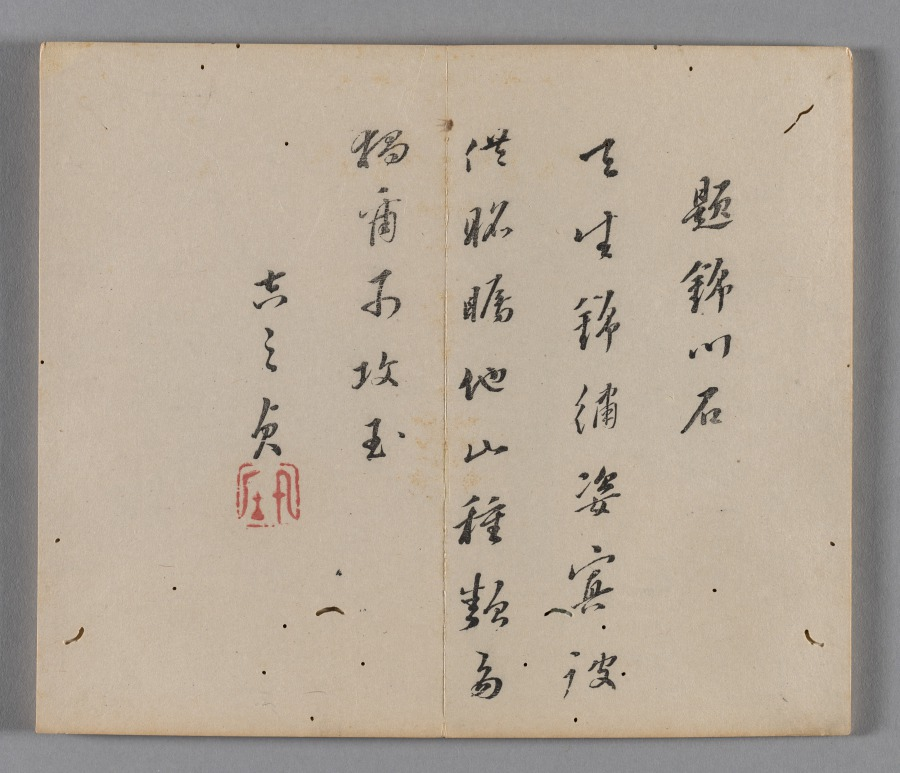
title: Ten Bamboo Studio Collection of Calligraphy and Painting: Miscellaneous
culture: China, Qing dynasty (1644-1911)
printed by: Hu Zhengyan (Chinese, c. 1584–1674)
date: 1633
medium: Woodblock-printed book; ink and colors on paper; first edition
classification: Print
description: Color printing reached a level of perfection in the early 1600s, as seen in this Ten Bamboo Studio Collection of Calligraphy and Painting and the Mustard Seed Garden Manual of Painting (printed 1679 and 1701). The painterly quality, precision in registering (aligning) the woodblocks, and harmonious colors made them the most successful color print editions in Chinese history. Both editions were printed and compiled in Nanjing, spread nationwide, and had a great impact on the arts in Japan and Korea.